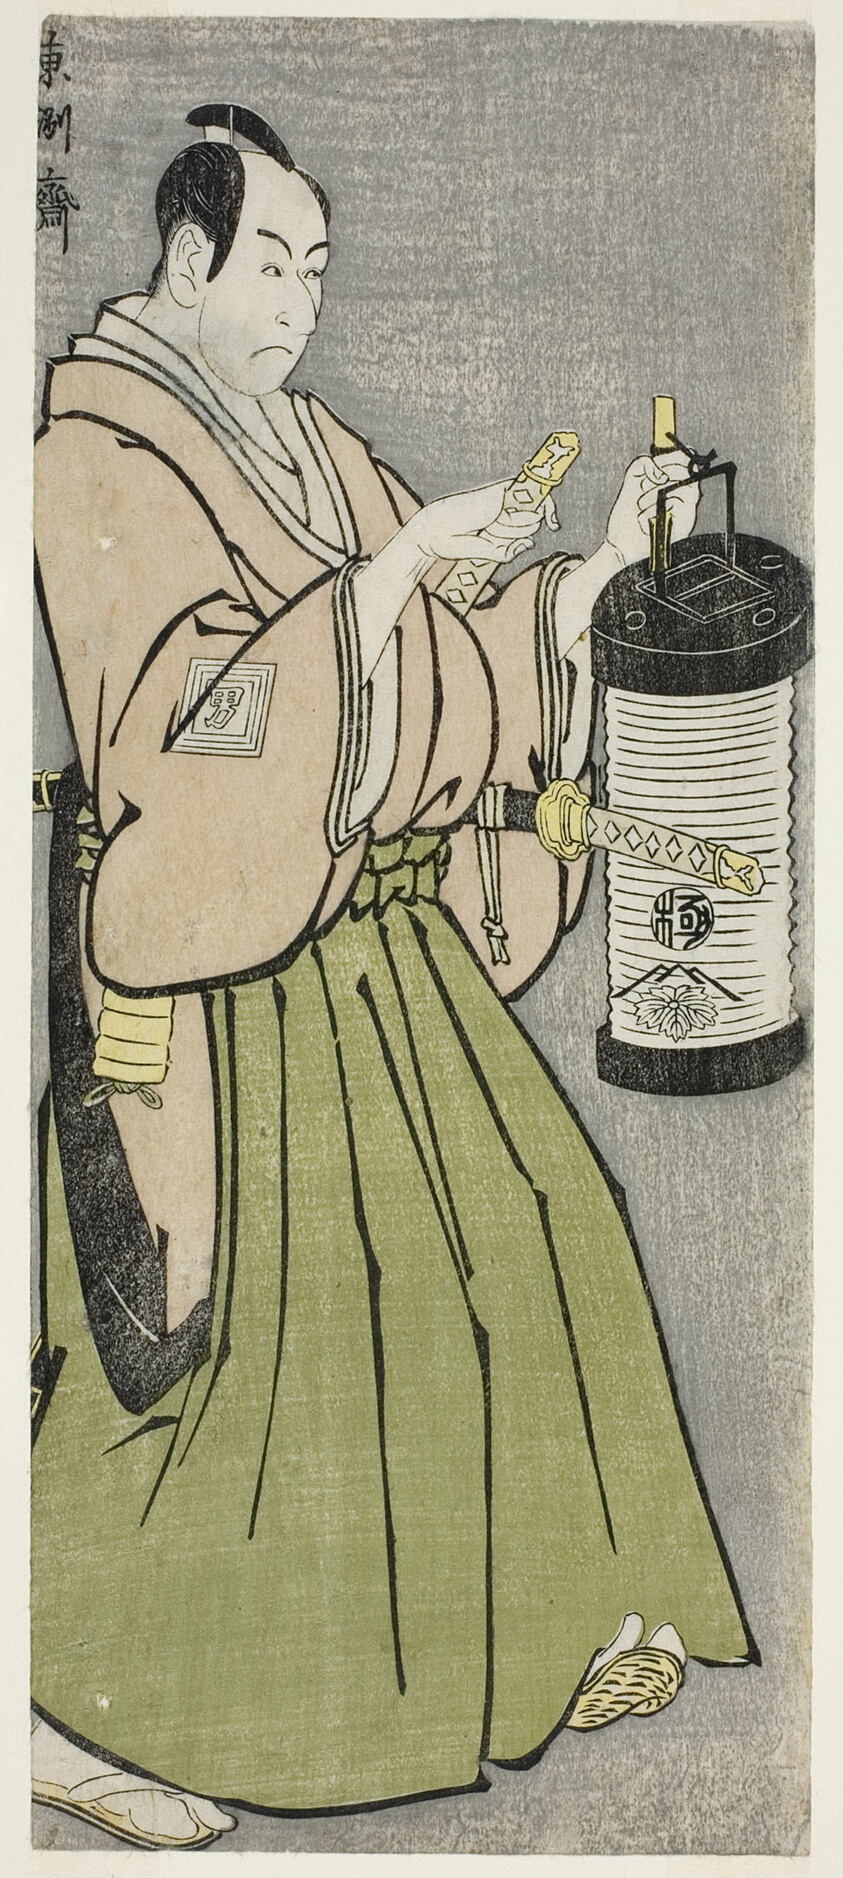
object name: Print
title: The Actor Ichikawa Omezo I as Tomita Hyotaro (Shodai Ichikawa Omezo no Tomita Hyotaro)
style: Japanese (culture or style)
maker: Toshusai Sharaku 東洲斎 写楽; Japanese, active 1794-95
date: 1794 (Kansei 6)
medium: Color woodblock print; hosoban, nishiki-e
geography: Japan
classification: woodblock print; print; asian art